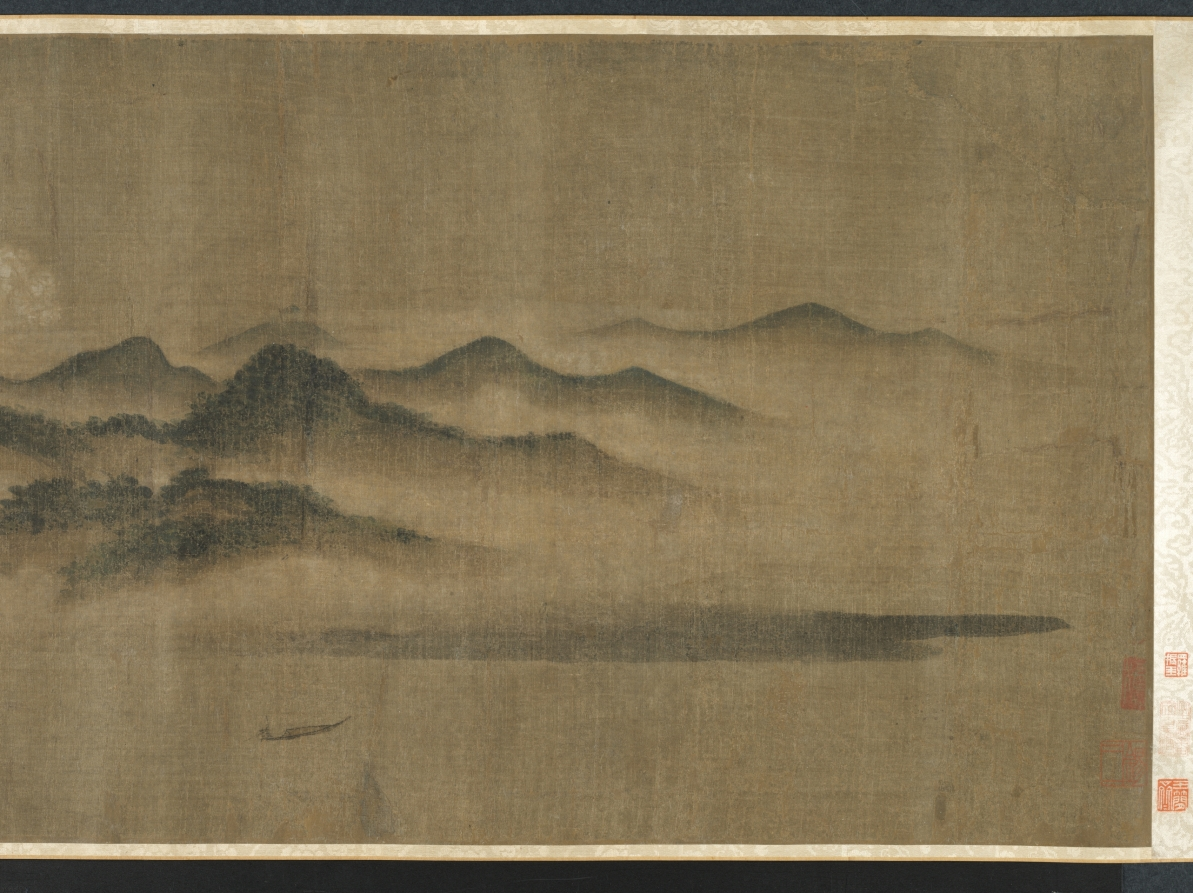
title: Cloudy Mountains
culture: China, Southern Song dynasty (1127-1279)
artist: Mi Youren (Chinese, 1072–1151)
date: 1130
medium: Handscroll; ink and color on silk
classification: Painting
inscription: 好山無數接天涯，烟靄陰晴日夕佳。/ 要識先生會到此，故留筆戲在君家。/ 庚戍歲，辟地新昌作。元暉。/ [seal] 元暉戲作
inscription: [Seal] 安陽孫氏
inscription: [Seal] 畢瀧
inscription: [Seal] 成親王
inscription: [Seal] 永瑆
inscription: [Seal] 錫三 appears twice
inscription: [Seal] 養性齋珍藏書畫印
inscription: [Seal] 芷陔審定真跡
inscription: [Seal] 玉簡齋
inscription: 2 colophons (1 dated 1650), inscription dated 1647, and 2 seals of Wang To (1592–1652)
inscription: 1 colophon, dated second month of the gengyin year 庚寅 (1650), and 2 seals of Chen Kuang 陳爌 (1646 jinshi degree)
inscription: 7 seals unidentified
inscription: A separate scroll containing six colophons on Cloudy Mountains exists; the inscribers are Luo Zhenyu 羅振玉 (1866–1940), Naito Torajiro 內藤虎次郎 (1866–1934), Nagao Ko 長尾甲 (1864–1942), and Wu Changshuo 吳昌碩 (1844–1927). Naito Torajiro alone wrote three colophons.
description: Cloudy Mountains captures the view of a lush and misty riverscape, an impression of Mi Youren’s new environment, painted in a moment of peace. With the fall of the Northern Song dynasty in 1127 upon the Jurchen’s military invasion, Mi Youren fled south across the Yangzi River. In 1130, he had reached Xinchang in Zhejiang province and thanked his host with this painting for having given him shelter. Mi Youren was the oldest son of the art critic Mi Fu (1051– 1107); both developed a distinct style of mountain scenery by accumulating wet ink dots that create a hazy atmosphere.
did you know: This scroll is one of the museum’s earliest dated Chinese paintings.